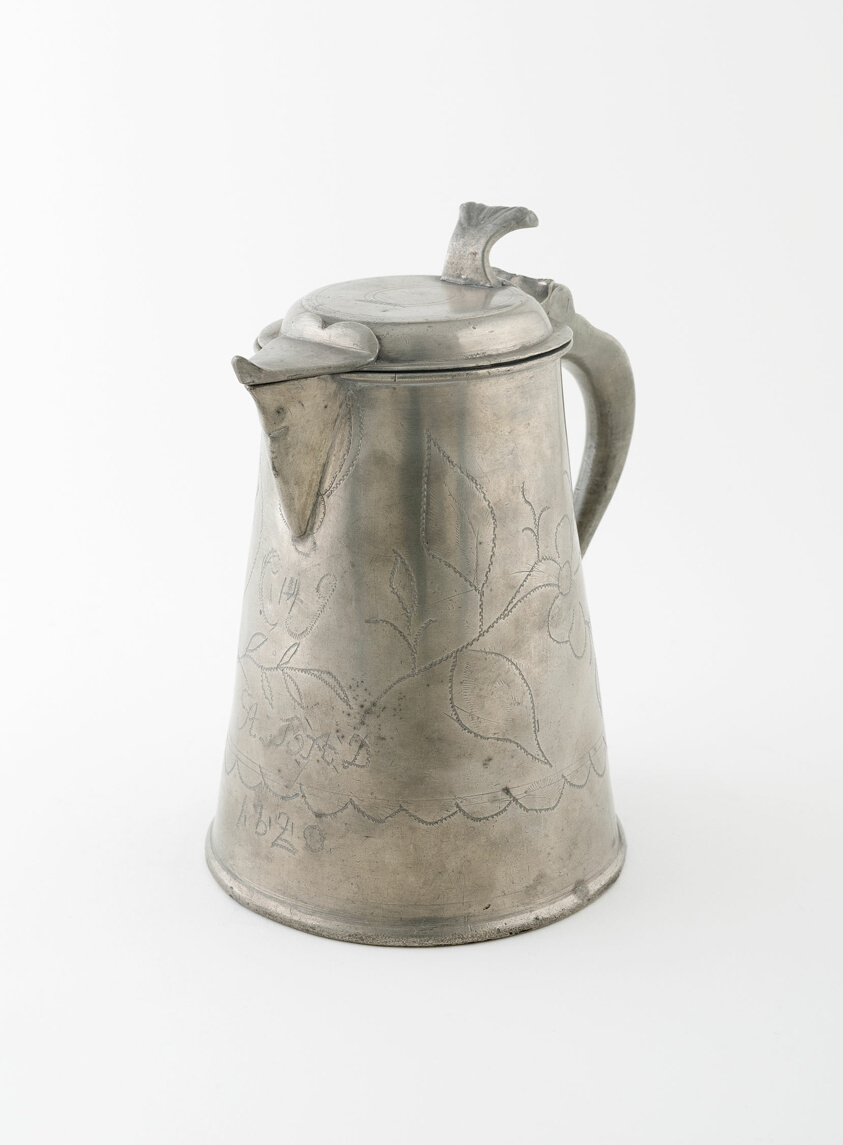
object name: Metalwork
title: Covered Flagon with Spout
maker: Sweden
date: 1820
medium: Pewter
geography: Sweden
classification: drinking vessel; pewter; metalwork; european decorative arts